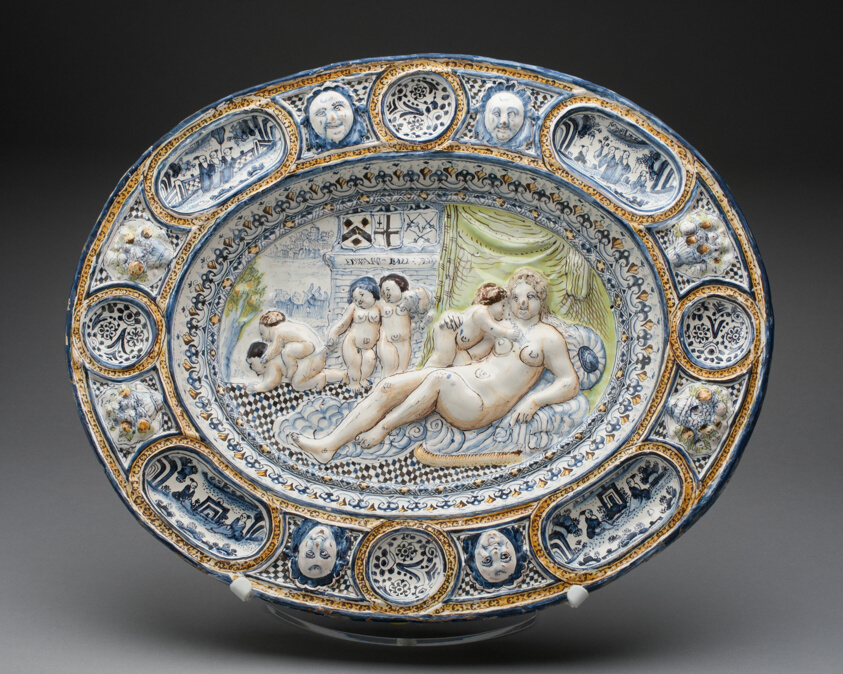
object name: Ceramics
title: Fecundity Platter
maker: Southwark, London, England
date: 1675–80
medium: Tin-glazed earthenware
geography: Southwark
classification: dish (vessel); earthenware; european decorative arts; tin-glazed ware; ceramics